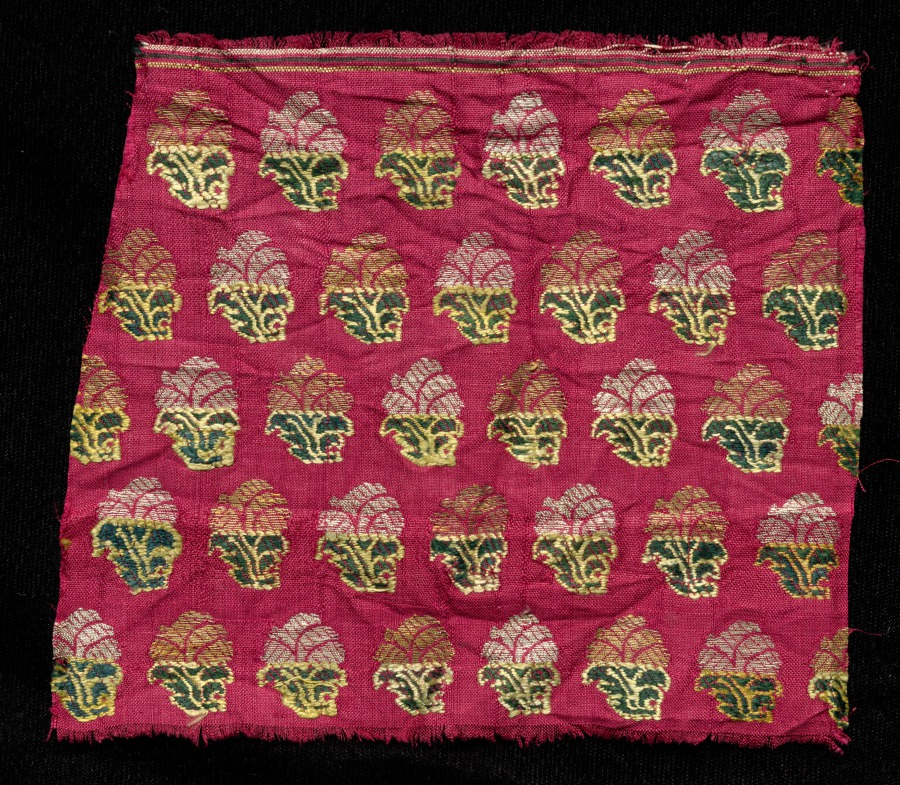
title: Fragment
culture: India, 19th century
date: 1800s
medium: brocade; silk, gold and silver threads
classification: Textile